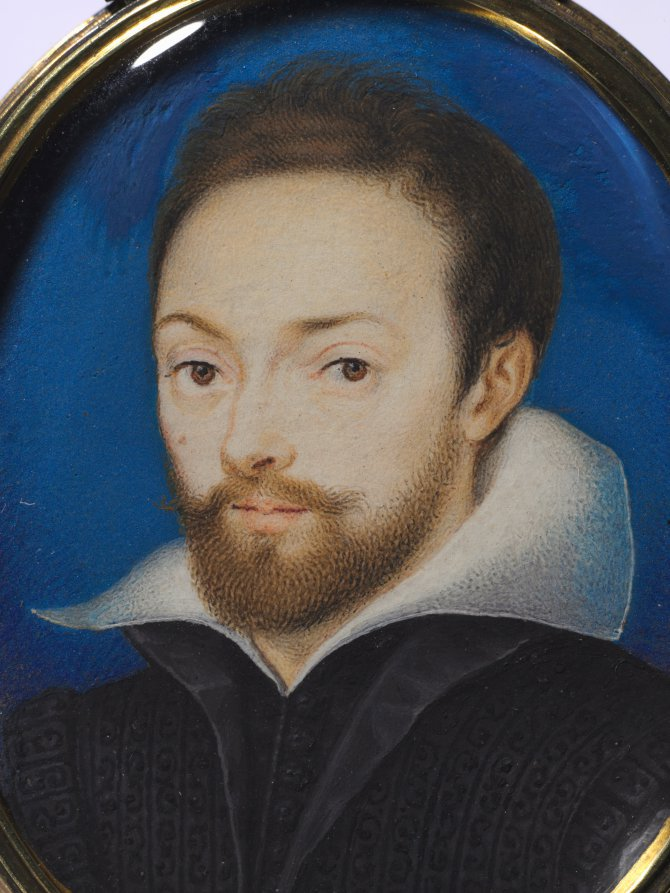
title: Portrait of a Man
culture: England, late 16th-early 17th century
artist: circle of Isaac Oliver (French, c. 1565–1617)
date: c. 1615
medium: watercolor on card in a later silver gilt frame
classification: Portrait Miniature